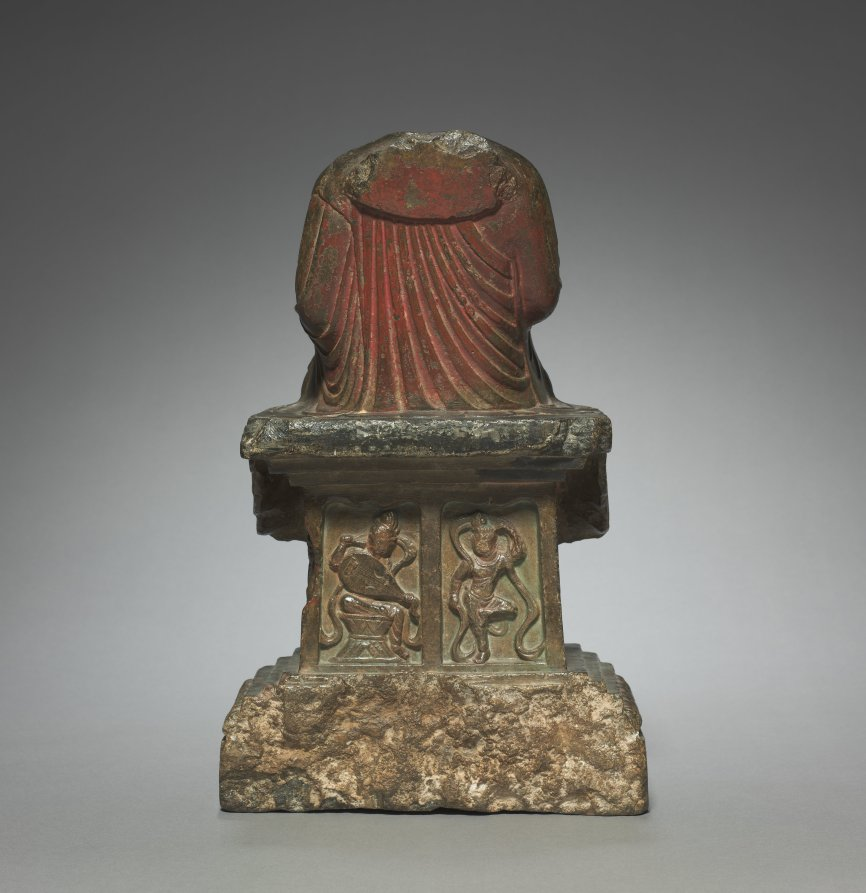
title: Mi-lê: Maitreya Buddha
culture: China, Tang dynasty (618-907)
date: 683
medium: limestone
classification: Sculpture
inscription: translation of inscription on the base: "On the eighth day of the second month of the second year of Yung-ch'un, the bhiksu Tz'u-(?) of the temple Hu-chung-ssu had this image of Maitreya and two attendant bodhisattvas made for the devotion of his whole family." (wkh)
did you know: Each of the Maitreya's feet is supported by a lotus blossom.